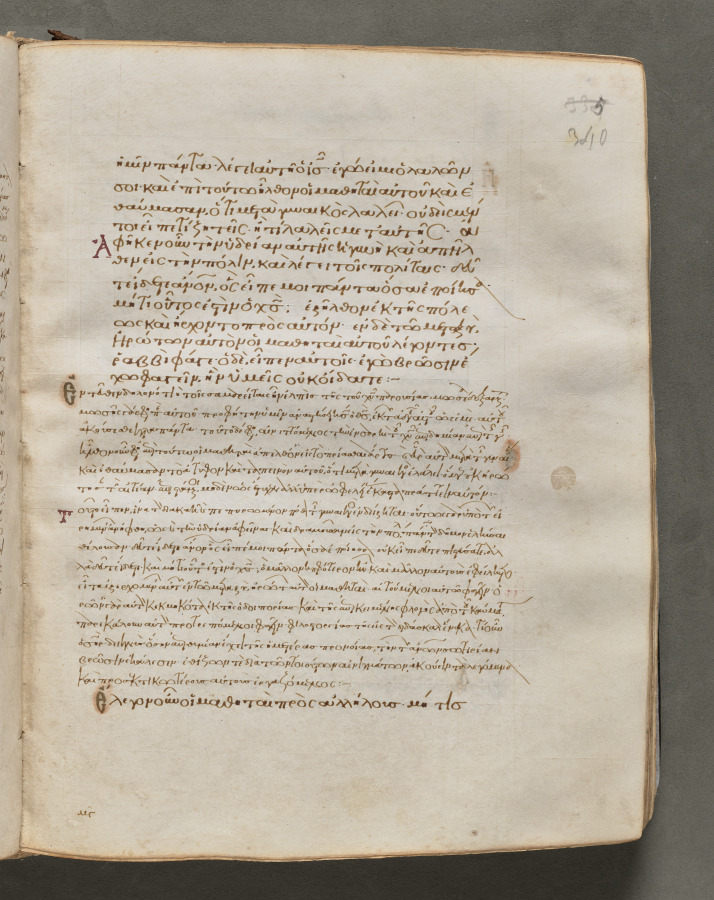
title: Text, folio 340 (recto), from a Gospel Book with Commentaries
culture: Byzantium, Constantinople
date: c. 1000–1100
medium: ink, tempera, and gold on vellum; leather binding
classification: Bound Volume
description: Each of the four gospels in this book opens on a page with brilliantly illuminated borders depicting the author of the text as well as birds—principally peacocks, symbols of the immortality of the soul—and fountains, representing the fountain of life and the salvation of the soul. This volume consists of 428 leaves with texts in Greek. Its level of sophistication suggests that it was probably written and decorated in a monastery in Constantinople.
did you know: Gospel books were carried in procession through Byzantine churches.